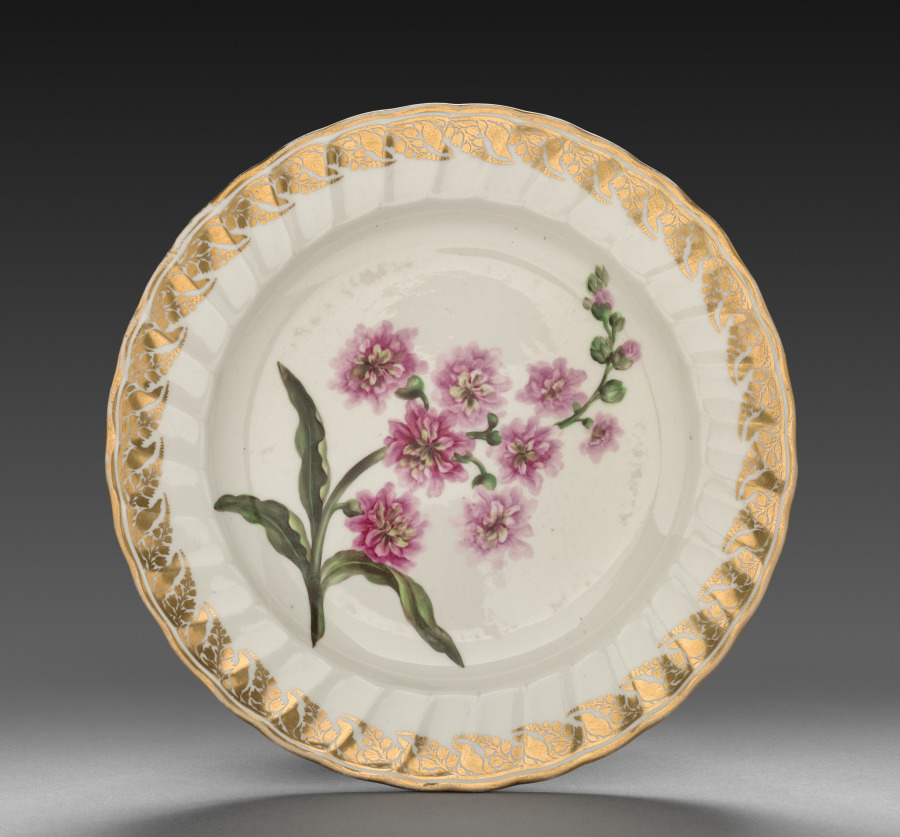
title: Plate from Dessert Service: Double Stock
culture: England, Derby, 18th century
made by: Derby (Crown Derby Period) (British)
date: c. 1800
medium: porcelain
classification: Ceramic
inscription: inscribed in blue on back: Cheiranthus Plenus./Double Stock./crown/crossed batons and dots/D/115. Near edge in blue: 9.